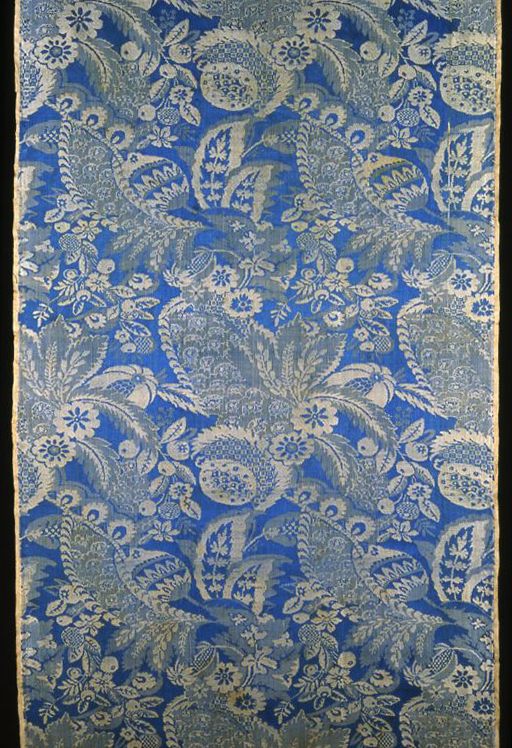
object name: Textile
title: Panel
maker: France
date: 1701/25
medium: Silk, satin damask weave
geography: France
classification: textile; weaving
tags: lace